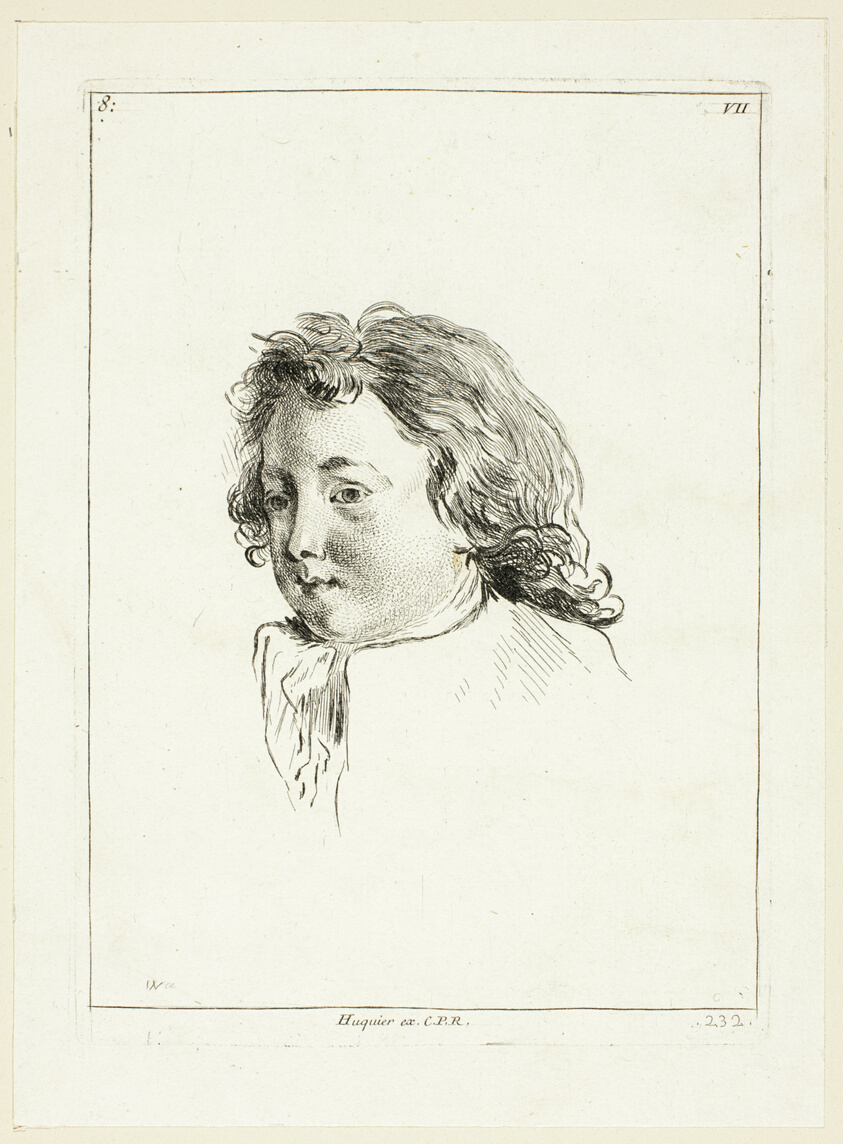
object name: Print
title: Boy's Head (turned to right)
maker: Anne Claude Philippe Caylus (French, 1692-1765)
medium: Etching and engraving on paper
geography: France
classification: etching; print; prints and drawing